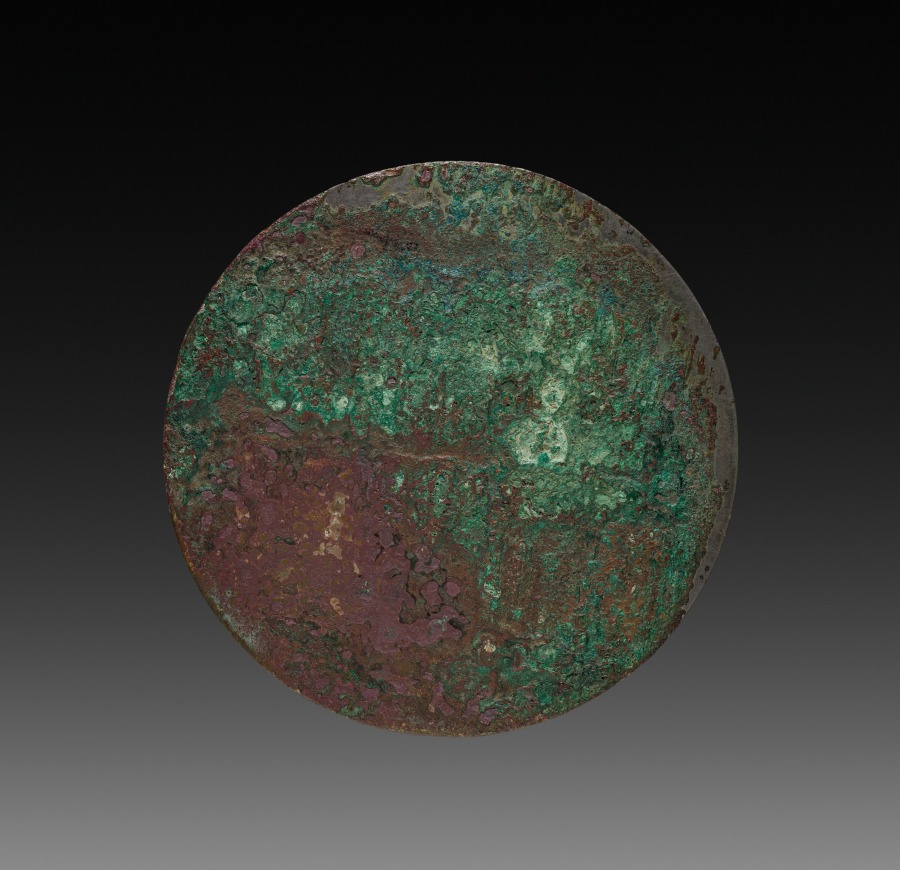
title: Mirror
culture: China, Eastern Han dynasty (25–220 CE)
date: 25–220 CE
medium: bronze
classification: Metalwork